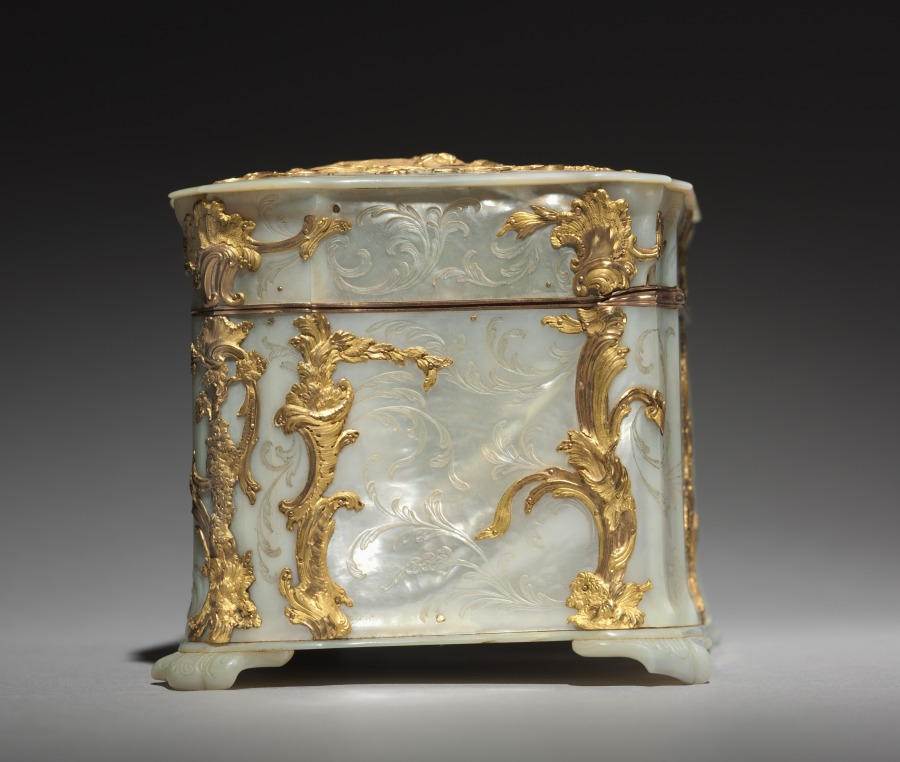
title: Sewing Box with Implements (Nécessaire)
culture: Austria, possibly Vienna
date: c. 1765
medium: gold and mother-of-pearl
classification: Miscellaneous